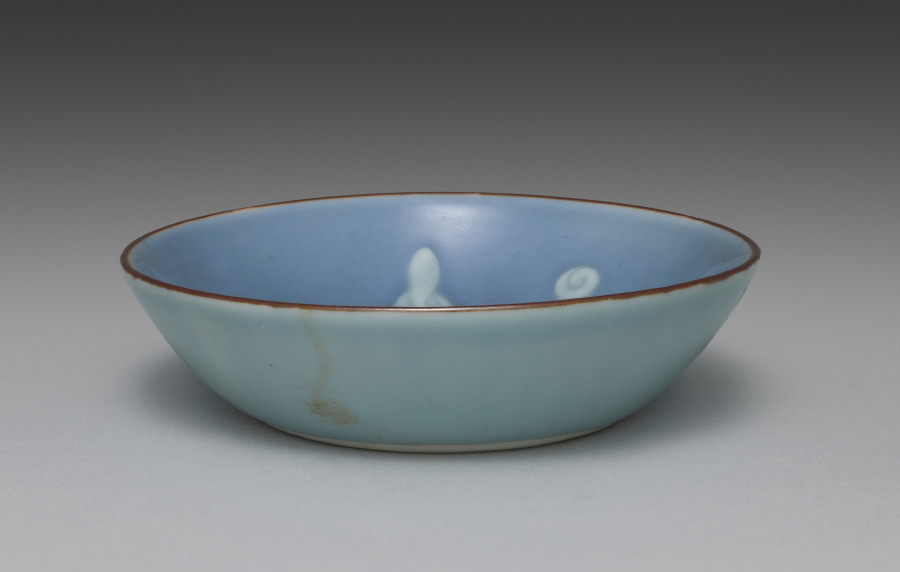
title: Dish from Dishes with Shells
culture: Japan, Meiji period (1868–1912) or Taishō period (1912–26)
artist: Seifū Yohei IV (Japanese, 1872–1951)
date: 1914–46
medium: One from a set of five dishes; porcelain with blue glaze, iron oxide, and molded design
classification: Ceramic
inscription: 清風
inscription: 清風造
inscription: 清風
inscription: 成山清風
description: Yohei IV chose an aquatic theme for this set of five mukōzuke, side dishes. He added an iron oxide rim and used a concentrated blue glaze on both the interior and exterior. The glaze, named on the box lid, is his father’s “evening moon” (tsukiyoi) color. The conch in relief takes up the entire bottom of the dish. Up the sides are two snails on one end and on the other a scallop. This results in a boldly graphic, less realistic effect.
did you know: This set of dishes, mukōzuke, could be used for serving small side dishes at a tea gathering.